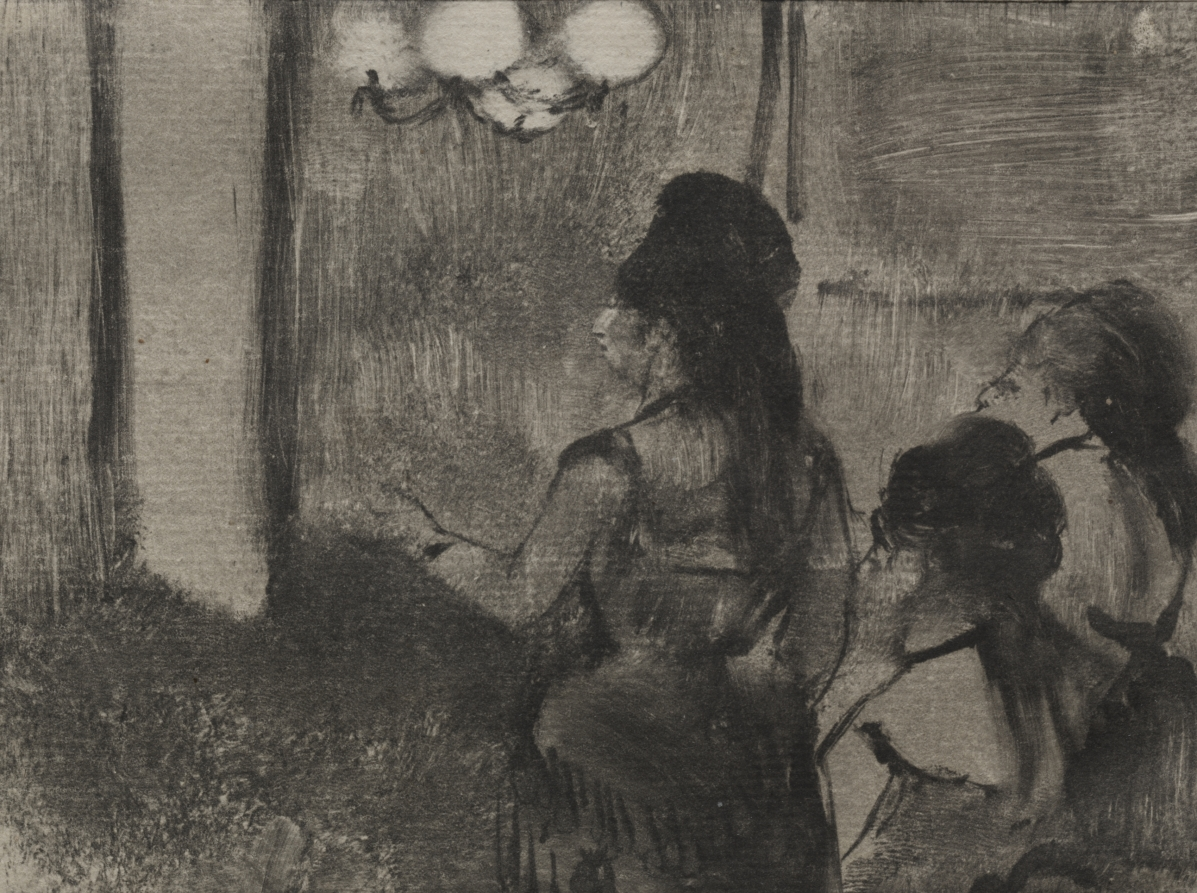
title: In the Salon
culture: France, 19th century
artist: Edgar Degas (French, 1834–1917)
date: c. 1880s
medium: monotype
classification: Print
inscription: Watermark: HALLINES [with fragment of shield]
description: Edgar Degas's series of monotypes depicting brothels depicted a hidden aspect of Parisian life. Degas's interest in the subject paralleled the theme of the prostitute in naturalist novels of the era by Emile Zola and Edmond and Jules de Goncourt, and echoed the then-contemporary debate about the regulation—or abolition—of prostitution in Paris. In this print, three women await their clients under a luminous globed chandelier. A standing figure reaches out her left arm as if to beckon an unseen visitor.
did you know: Edgar Degas's series of brothel monotypes was never exhibited during his lifetime and remained in the privacy of the artist's studio until his death.